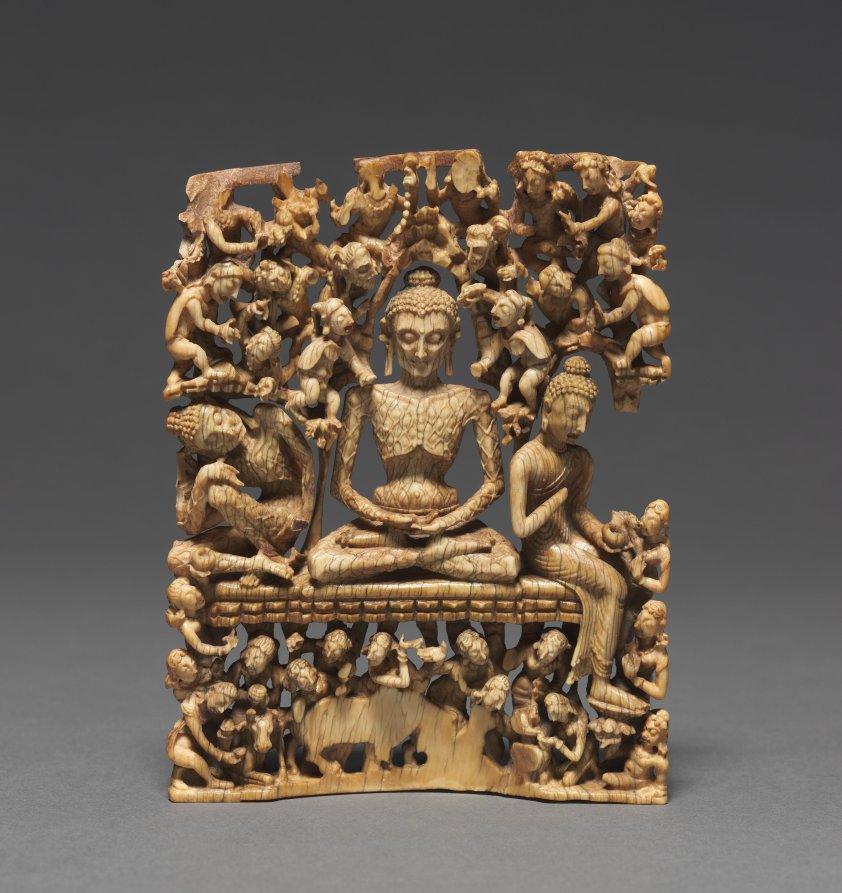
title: Fasting Buddha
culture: India, Kashmir, 8th century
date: 700s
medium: ivory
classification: Ivory